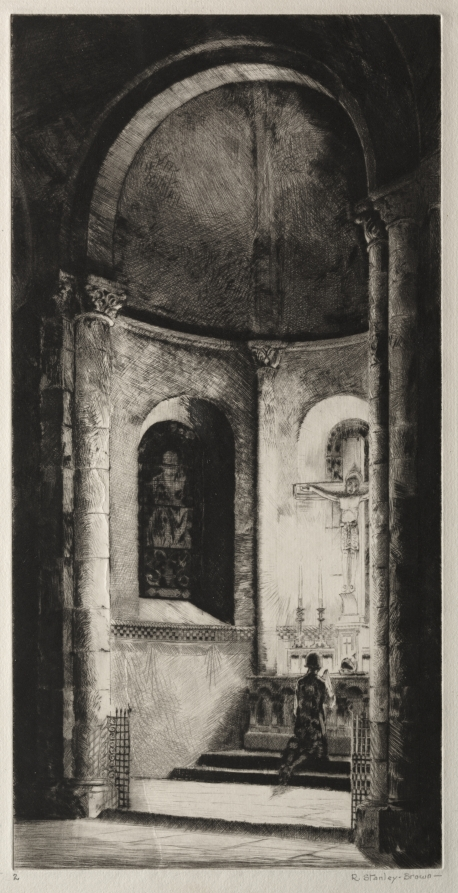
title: Crusader's Vigil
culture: America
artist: Rudolph Stanley-Brown (American, 1889–1944)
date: c. 1926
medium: drypoint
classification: Print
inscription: Penciled on lower-right corner: "R. Stanley-Brown (signed)"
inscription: Penciled on lower-left corner: "2"